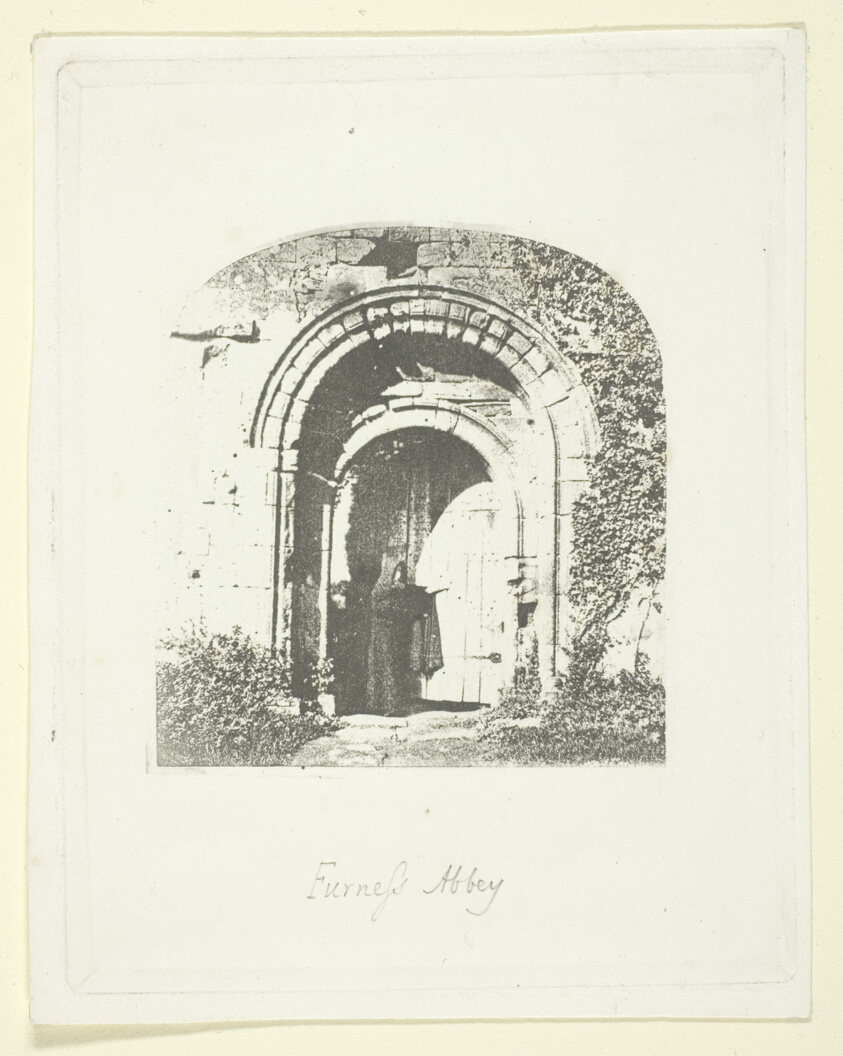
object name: Photograph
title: Furness Abbey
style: 19th century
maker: William Henry Fox Talbot (English, 1800–1877)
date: c.1853/58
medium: Photoglyphic engraving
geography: England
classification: engraving; printing process; photography; photograph